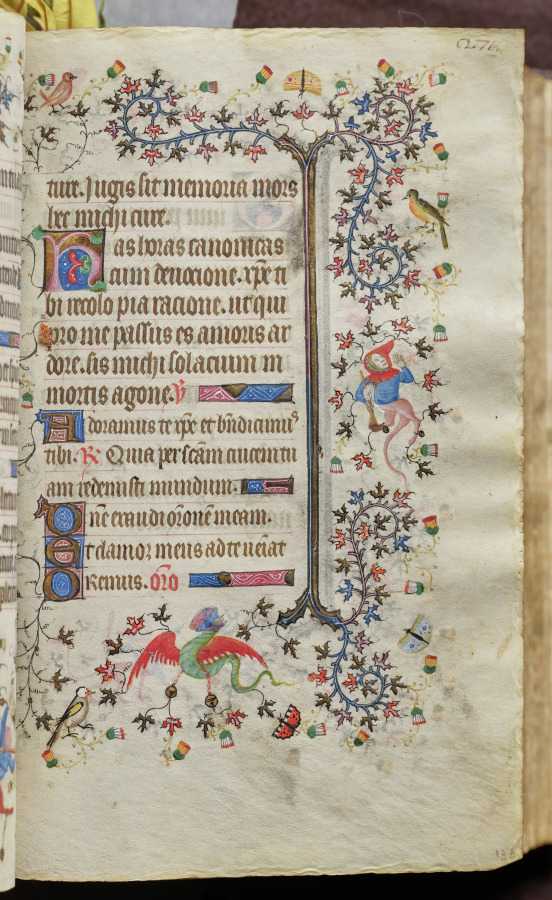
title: Hours of Charles the Noble, King of Navarre (1361-1425): fol. 136r, Text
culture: France, Paris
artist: Master of the Brussels Initials and Associates (French)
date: c. 1405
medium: ink, tempera, and gold on vellum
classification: Bound Volume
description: This precious volume was obviously highly prized by its owner, the French-born King of Navarre, who had his coat of arms painted on no less than twenty folios. Rather than directly commissioning this manuscript from a specific workshop, it seems that Charles the Noble acquired his book of hours -- perhaps ready-made for the luxury market -- while on a trip to Paris in 1404-05. A collaborative effort, six painting styles are evidenced within the pages of this codex, those of two Italians, two Frenchmen, and two Netherlanders. The painter who was responsible for the planning and decoration of the book, and who produced seventeen of the large miniatures, was a Bolognese artist known as the Master of the Brussels Initials. His principal assistant, responsible for most of the borders, was a Florentine who signed his name "Zecho" da Firenze on folio 208 verso.